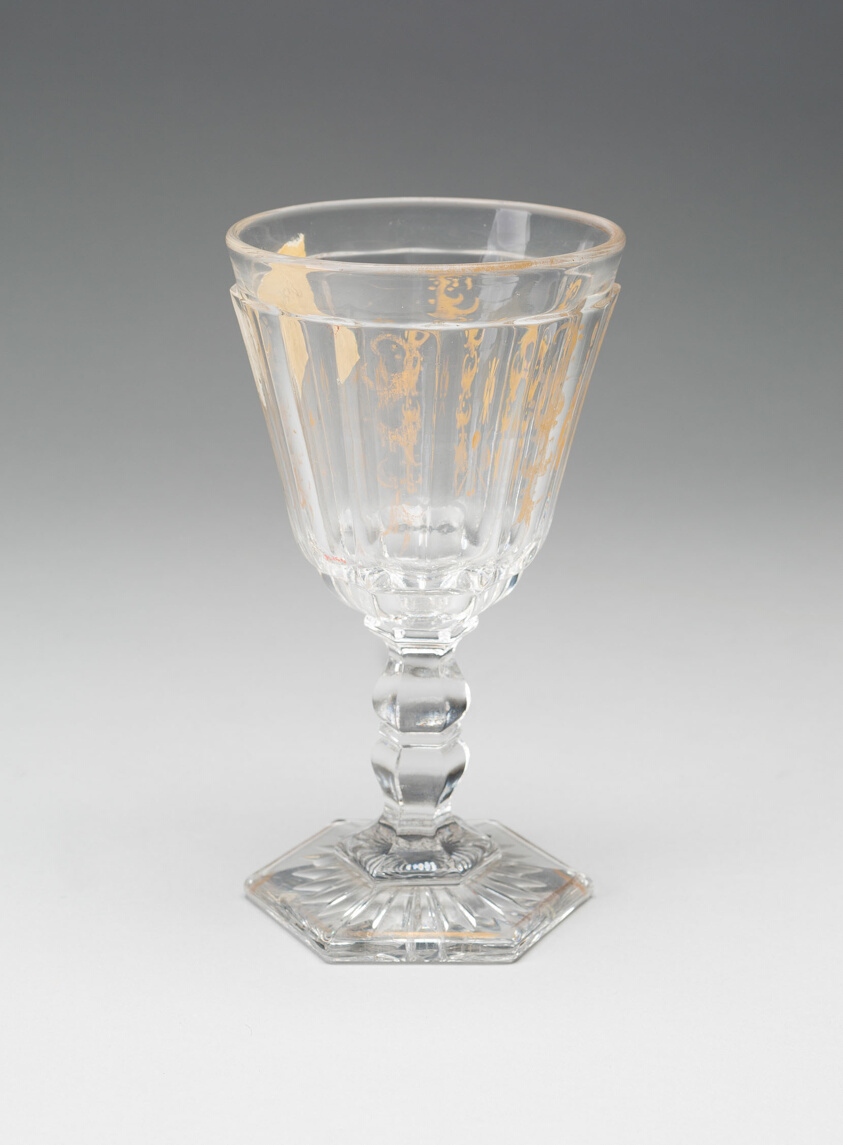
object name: Glass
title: Goblet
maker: France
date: 1825/50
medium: Glass with gold decoration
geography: France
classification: drinking vessel; glass; european decorative arts